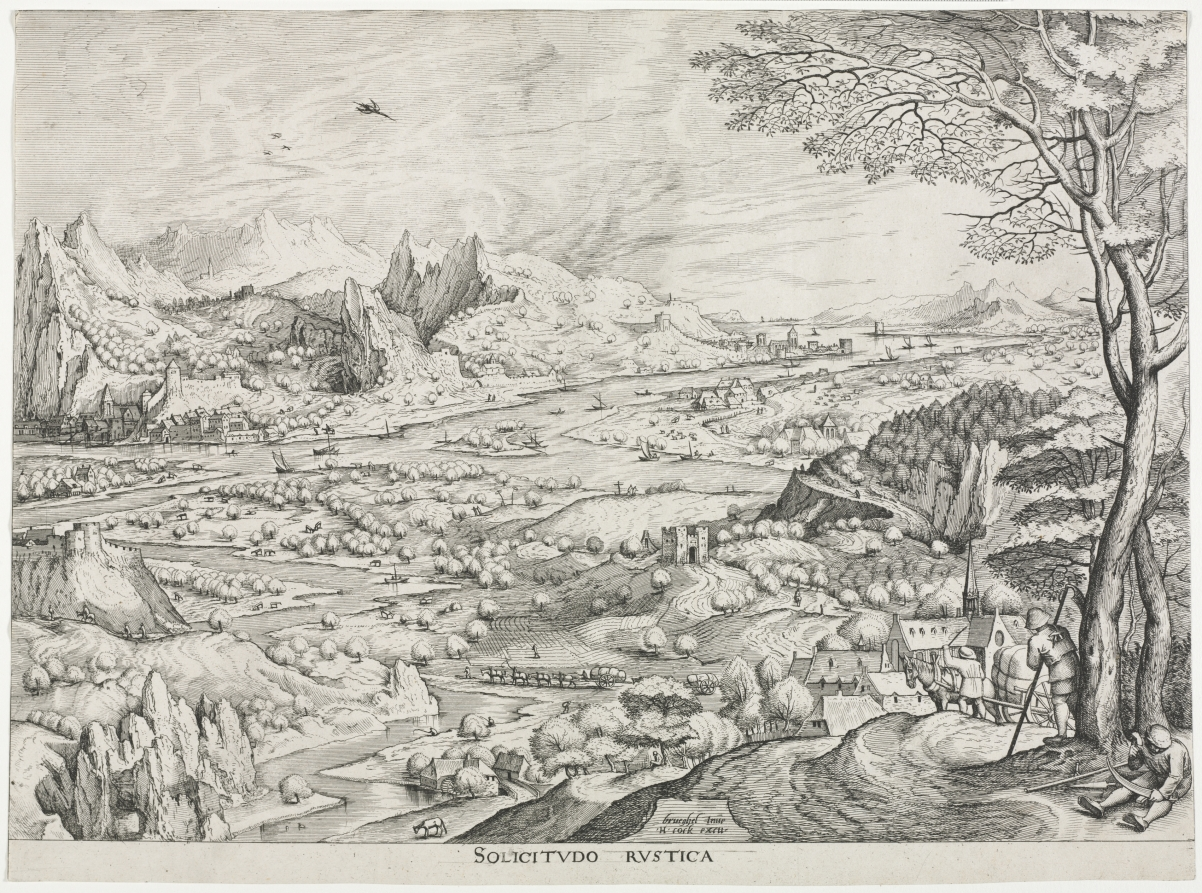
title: The Large Landscapes: Solicitudo Rustica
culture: Flanders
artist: attributed to Jan van Doetechum (Flemish, 1530–1616)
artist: and Lucas van Doetechum (Flemish)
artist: after Pieter Bruegel (Netherlandish, c. 1525/30–1569)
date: c. 1555–58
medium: engraving and etching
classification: Print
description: In the Netherlands, Pieter Bruegel’s designs for a series of large landscape prints may have relied on sketches (now lost) he made passing through the Alps in the early 1550s. This view is more a compendium of various visual characteristics of the Alps, rather than a specific place. The elevated point of view and massive, powerful cliffs and crags in the distance give way to a river valley and flat plains akin to Bruegel’s Low Countries homeland. The figures include peasants whose mundane activities reinforce the landscape as a container for “rustic cares” (solicitudo rustica).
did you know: The letters "inue" next to the artist's name, "brueghel," represented the word "inventit," Latin for "has designed it."